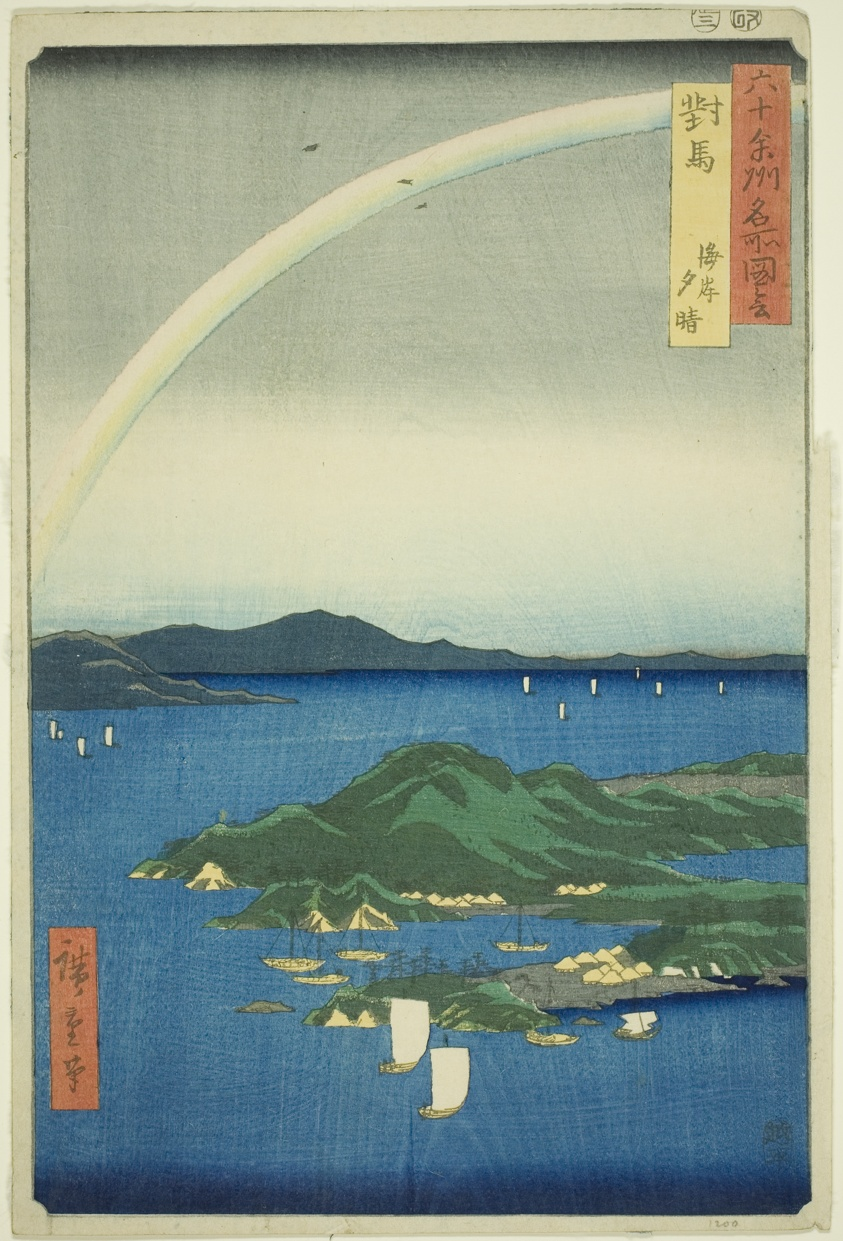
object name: Print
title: Tsushima Province: Clear Evening on the Coast (Tsushima, Kaigan yubare), from the series "Famous Places in the Sixty-odd Provinces (Rokujuyoshu meisho zue)"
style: Japanese (culture or style)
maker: Utagawa Hiroshige 歌川 広重; Japanese, 1797-1858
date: 1856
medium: Color woodblock print; oban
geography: Japan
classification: woodblock print; print; asian art